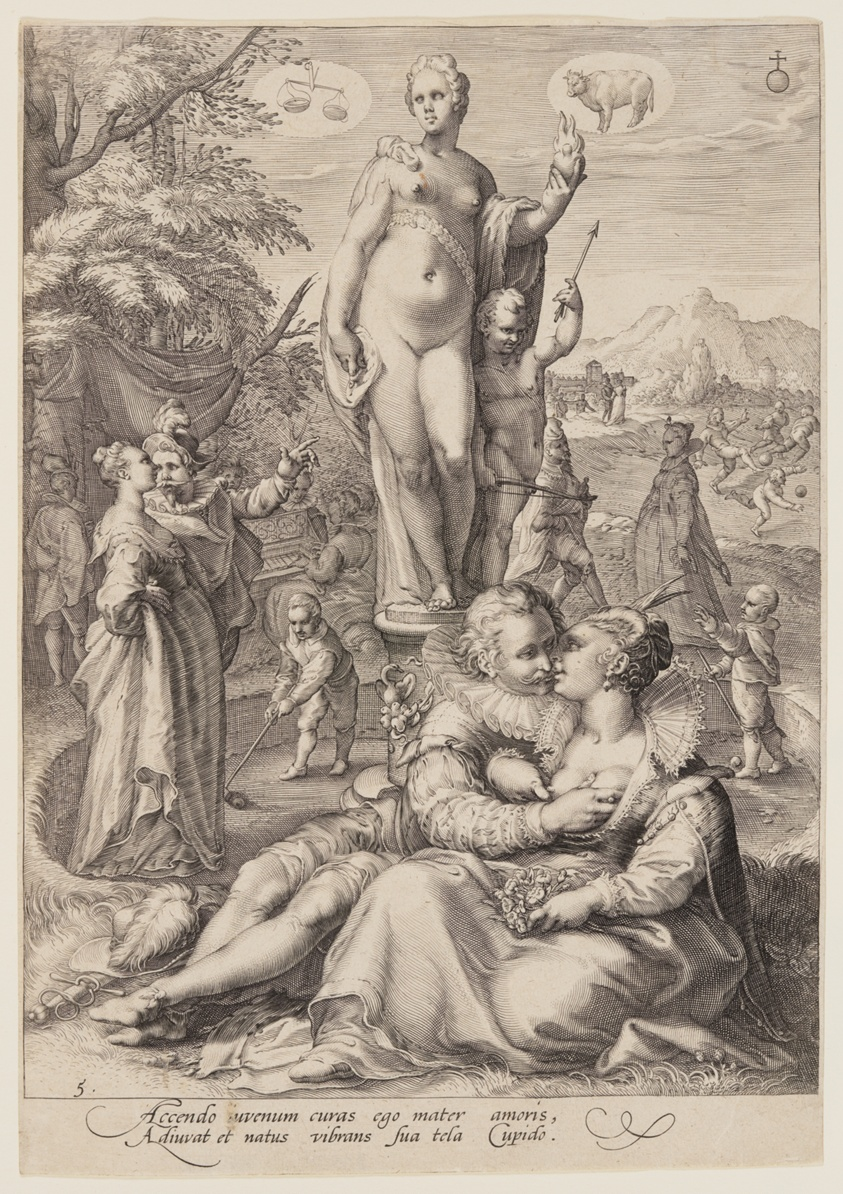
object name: Print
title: Venus Presiding over the Realm of Love, from Seven Planetary Gods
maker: Jan Saenredam (Dutch, 1565–1607); after Hendrick Goltzius (Dutch, 1558–1617)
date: 1596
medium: Engraving on ivory laid paper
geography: Netherlands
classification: engraving; paper; print; prints and drawing